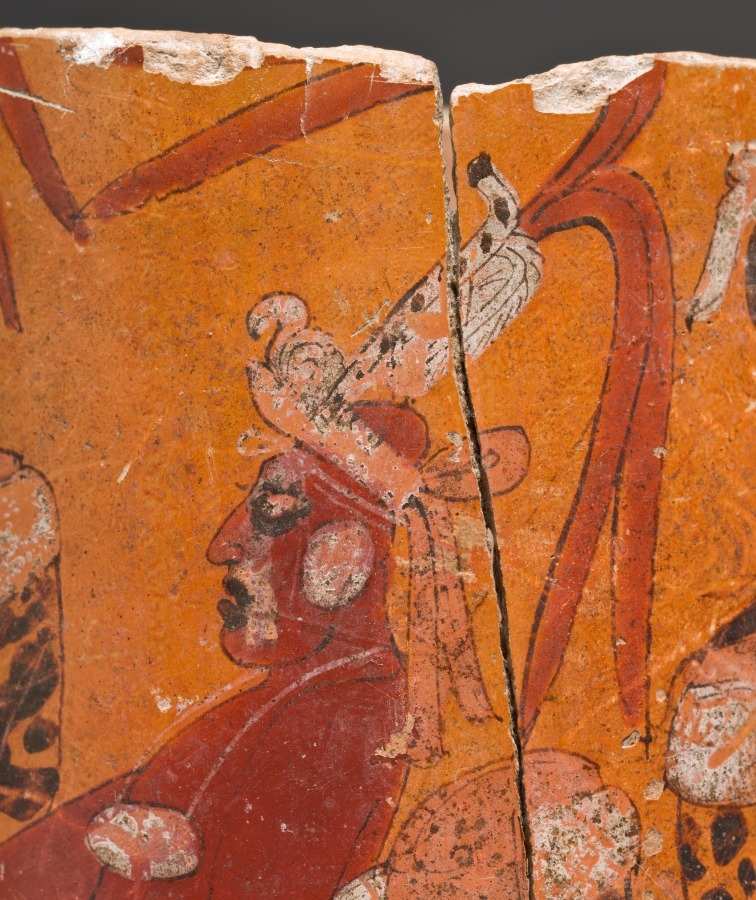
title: Cylindrical Vessel with Palace Scene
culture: Mexico or Central America, Maya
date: 600–900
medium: earthenware with colored slips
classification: Ceramic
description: The scene here may commemorate a special event in the life of a Maya ruler, who stands on a stairway before his throne, his legs framed by a litter on the ground. His gesture and the jaguar pelt at the waist visually unify him with his attendants. The ruler perhaps used the vessel as a drinking cup on important occasions; fine ceramics also served as gifts and as offerings in tombs.